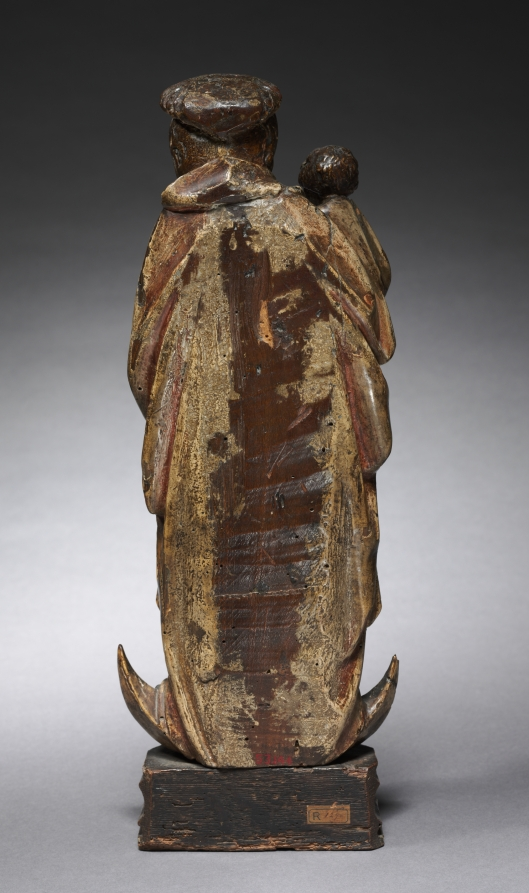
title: Virgin and Child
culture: South Netherlands, Malines, 16th century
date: c. 1510–1515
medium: painted and gilded walnut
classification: Sculpture